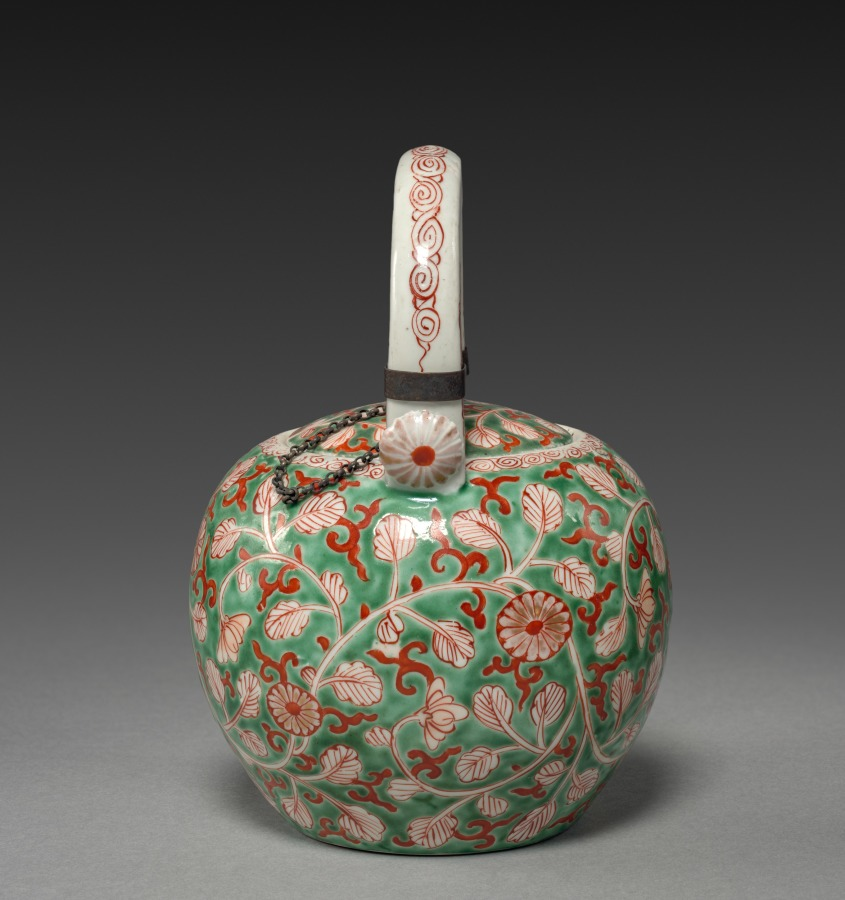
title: Wine Pot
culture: Japan, Edo period (1615–1868)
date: 1615–1868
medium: porcelain with colored enamel decoration (Hizen ware, Arita type)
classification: Ceramic